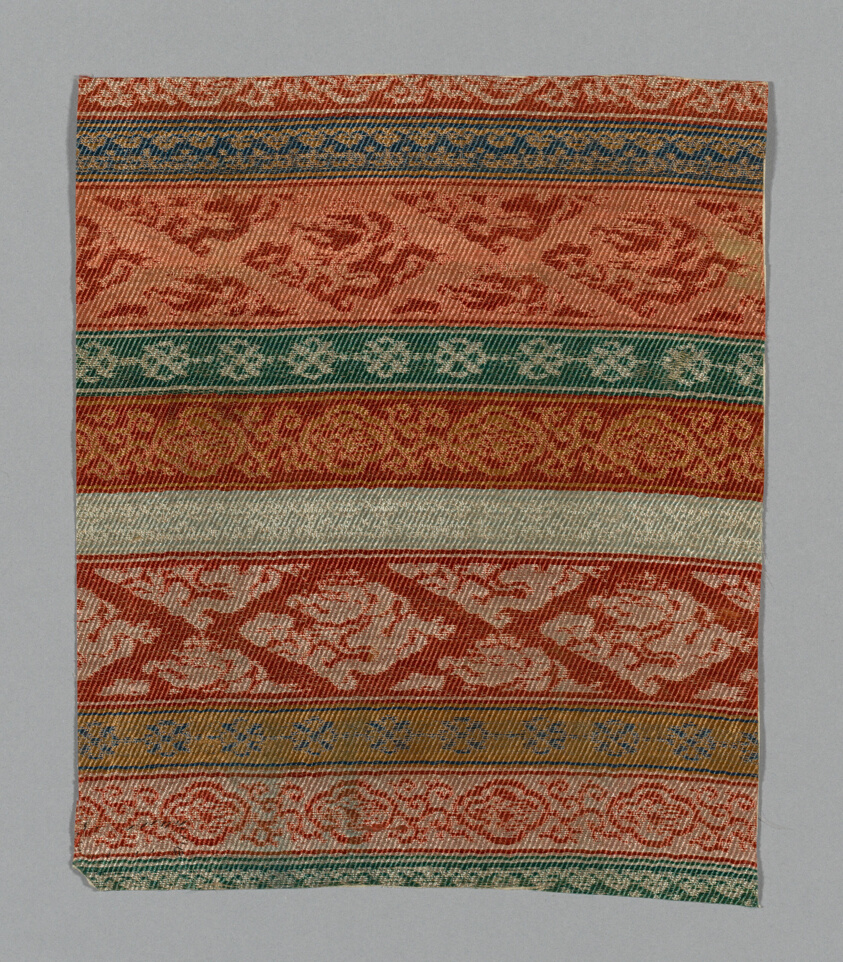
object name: Textile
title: Fragment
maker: China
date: Qing Dynasty (1644–1911), early 19th century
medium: Silk, complementary weft twill weave with inner warps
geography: China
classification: textile; weaving